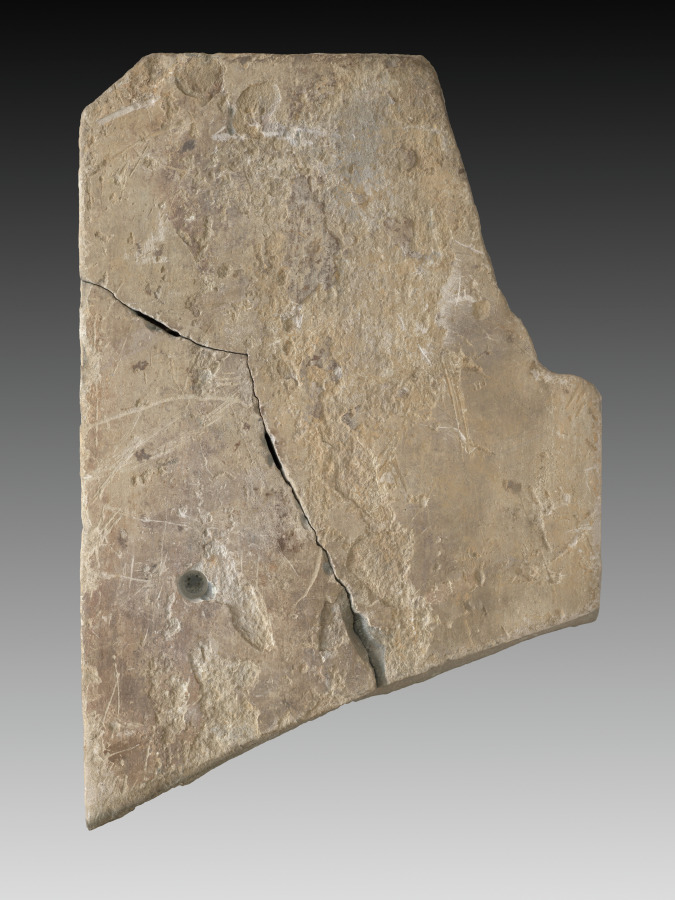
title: Krishna Lifting Mount Govardhan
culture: Southern Cambodia, Takeo Province, Phnom Da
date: c. 600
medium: Sandstone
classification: Sculpture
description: This masterwork of early Cambodian sculpture shows the Hindu god Krishna effortlessly holding aloft a mountain to protect his fellow villagers and herds from torrential storms sent by a jealous old god. It is one of eight monumental monolithic figures recovered from a two-peaked mountain in the floodplains of the Mekong River delta, on the outskirts of the ancient urban center of Angkor Borei.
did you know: Gold earrings were once fastened to the sculpture using holes in the figure's earlobes.